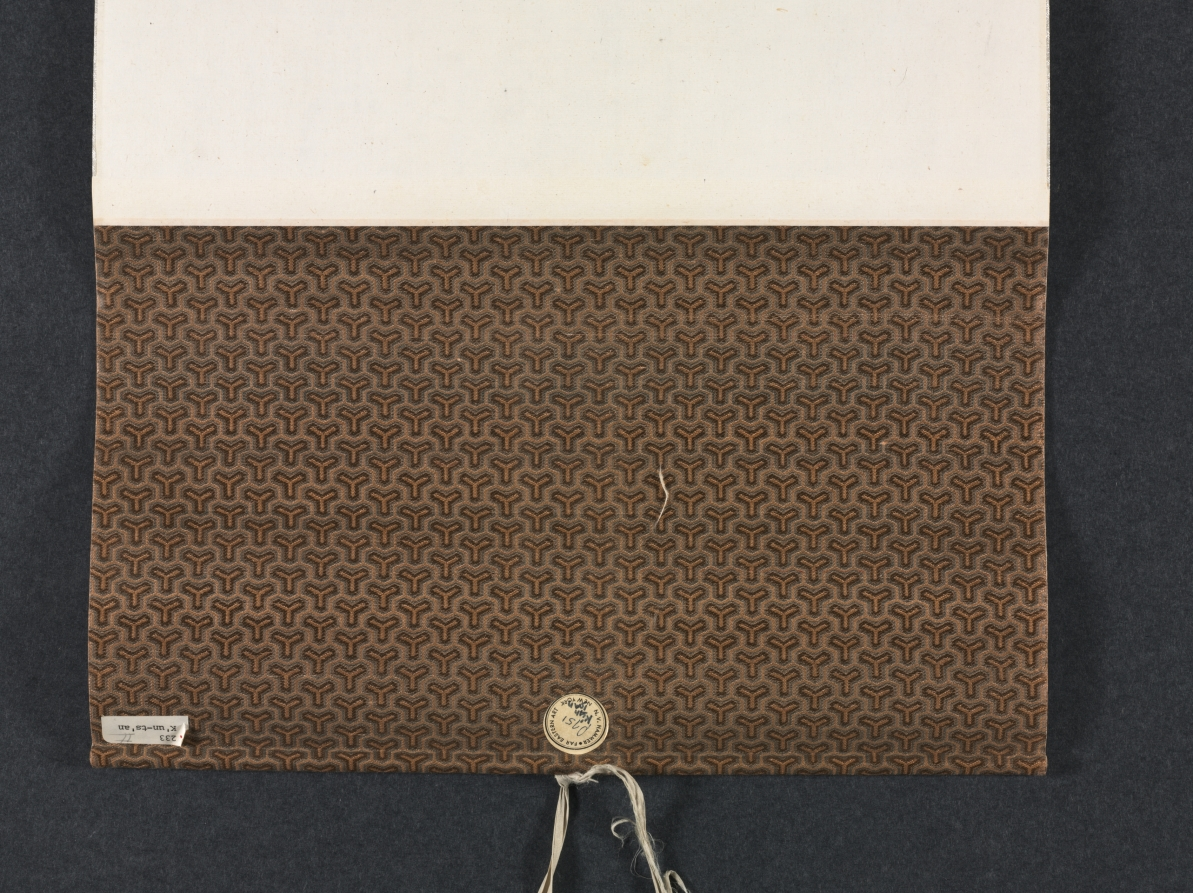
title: Spring Landscape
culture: China, Qing dynasty (1644–1911)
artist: Kuncan (Chinese, 1612–c. 1673)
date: 1666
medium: double album leaf mounted as a handscroll; ink and color on paper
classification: Painting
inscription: 遊山忘歲月，屐舄自相過。 風露寒虚意，禪機靜裡磨。 同年叩梵宇，遂此老煙蘿。 豈向人間說，林丘自在多。 畫必師古，書亦如之。觀人亦然，况六法乎。石谿殘道人 印二：石谿，白秃。另有「介丘」一印在右邊。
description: One of the acclaimed "Four Monks" (the other three being Zhu Da, Daoji, and Hongren), Kuncan was known for the rough and rustic style of his landscape paintings. This painting was once part of a large album, painted at the request of his friend Cheng Zhengkui (active 1630–74), with whom he shared a common interest in painting and poetry. The inscription contains a poem, which reads: Wandering through mountains and oblivious of time, We met in casual shoes (and attires). The wind and dew drops harbor a chilling emptiness. Only with patience and silence can the Chan inspiration come. . . .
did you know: This spring scene was once accompanied by album leaves of summer (now in the Museum für Asiatiche Kunst, Berlin) and autumn and winter (now in the British Museum).